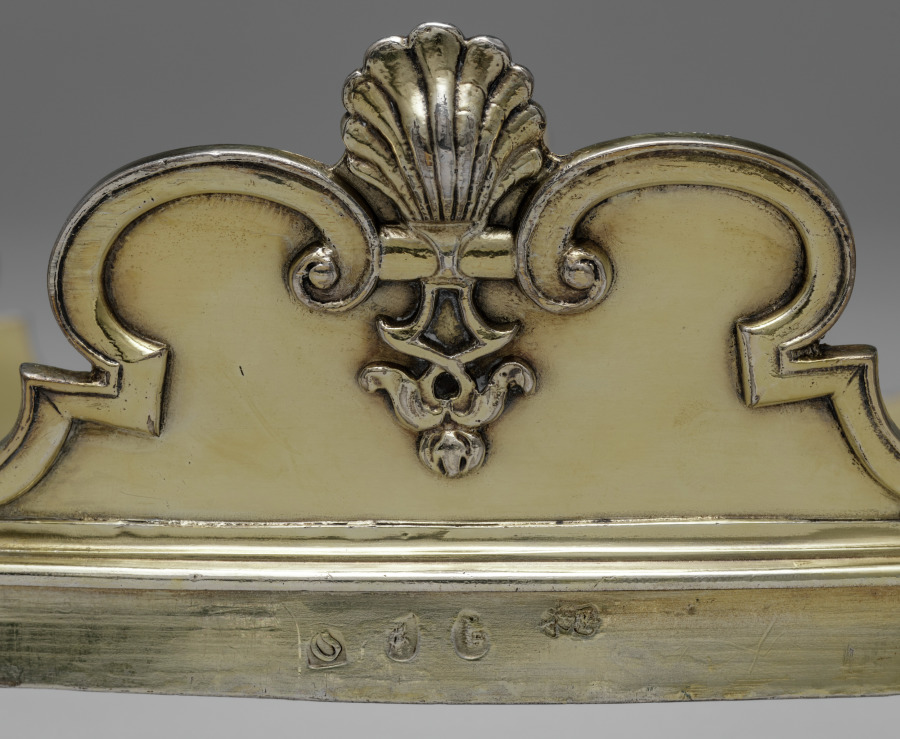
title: Rim for a Monteith Bowl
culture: England, London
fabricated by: Benjamin Pyne (English, active 1693–1727)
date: 1715–16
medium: silver gilt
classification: Silver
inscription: engraved, center of bowl: arms, crest of Byam family (mantling and helmet were probably engraved at time bowl was made, crest and arms were altered to those of Byam at later date). Rim engraved with Byam Crest (also presumably not original).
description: This bowl’s notched rim allows for glasses to be suspended in water for cooling and cleansing between courses during a long dinner. The rim can be removed and the bowl used for punch as well. A year before Benjamin Pyne began this bowl, he was appointed Subordinate Goldsmith to the King in preparation for George I’s coronation (r. 1714–1727). Like much of his work, this Monteith bowl is characterized by its scale and simplicity.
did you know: The name Monteith is said to come from a mythical Scotsman named Monteigh, who wore cloaks with a similar notched pattern.